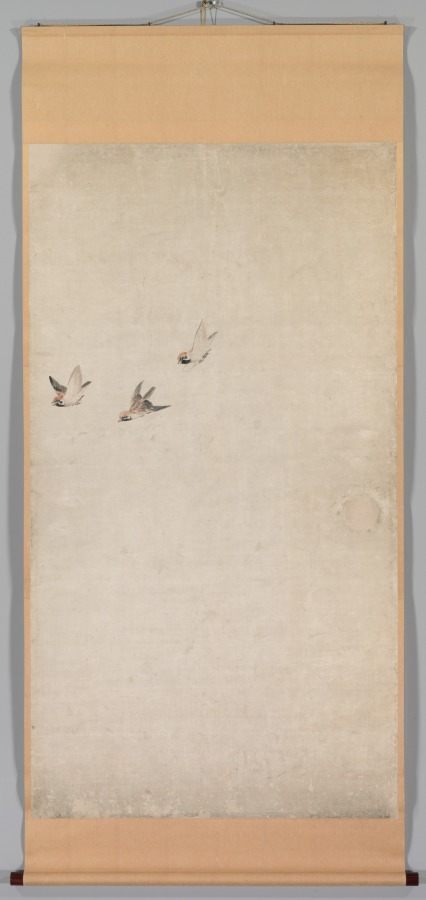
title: Puppies, Sparrows, and Chrysanthemums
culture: Japan, Edo period (1615–1868)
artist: Nagasawa Rosetsu (Japanese, 1754–1799)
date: c. 1792–94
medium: Fusuma panel remounted as a hanging scroll; ink and slight color on paper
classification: Painting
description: These paintings were originally mounted as sliding doors (fusuma) used inside a building. The circular areas on the paintings’ paper surfaces are traces of the former positions of the door pulls (hikite). A flock of sparrows gathers on a trellis supporting flowering chrysanthemum. Below is a litter of puppies, some cavorting, others napping. The tender story created by the curious puppy peering up and tilting its head to listen to the bird’s insistent call in the leftmost part of the composition is characteristic of Nagasawa Rosetsu’s paintings, which often use animals to illustrate the human condition.